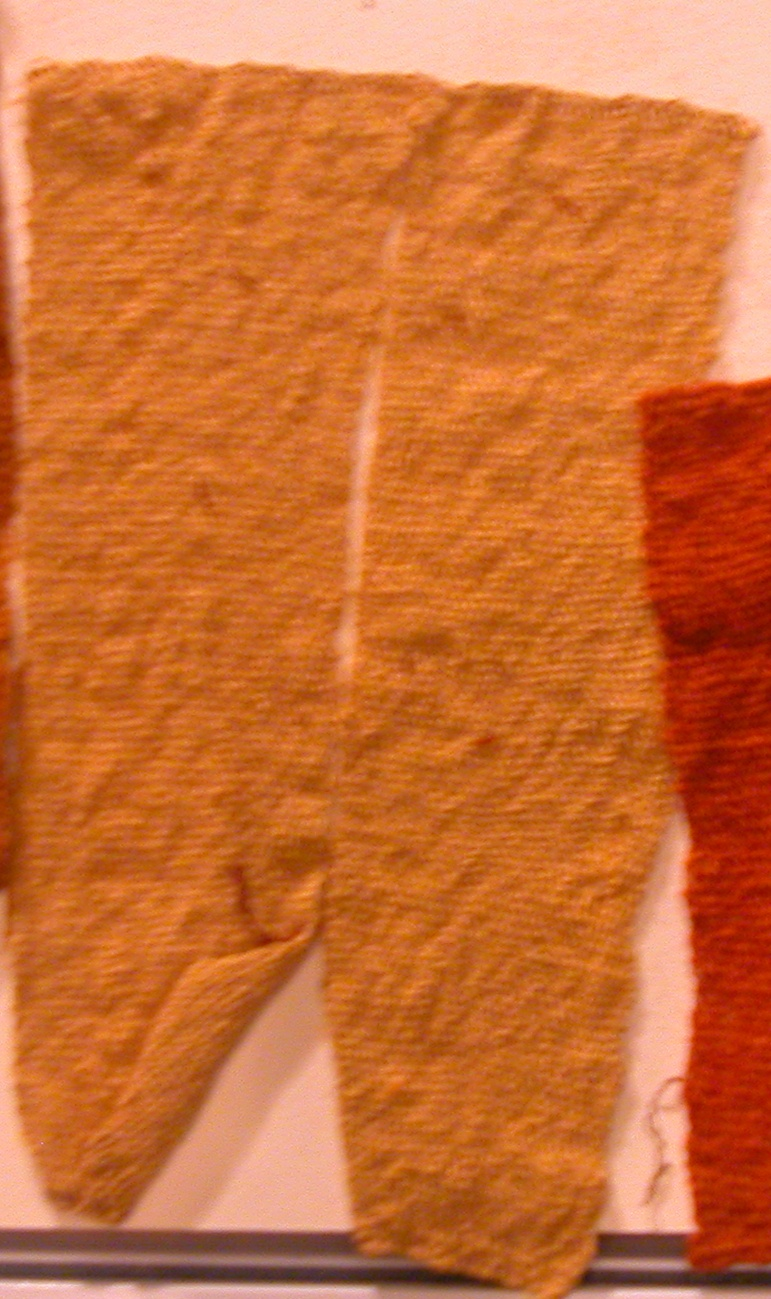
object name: Textile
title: Fragment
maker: Peru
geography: Peru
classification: textile; weaving